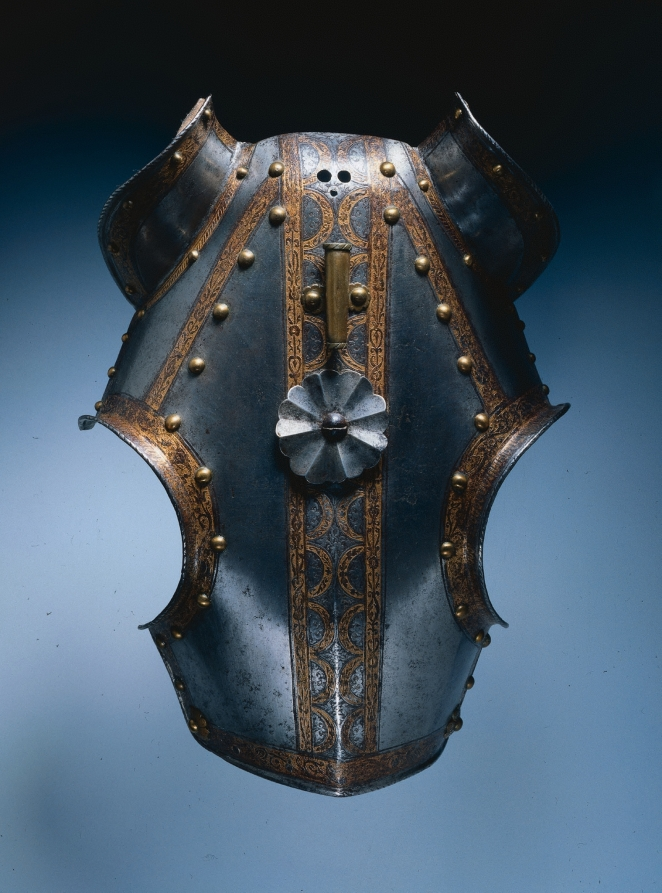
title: Demi-Chanfron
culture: Germany, Augsburg, 16th century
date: c. 1550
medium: steel, etched and gilded; leather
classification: Arms and Armor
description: The chanfron, head defense for a horse, was introduced in the 1300s. It included two side pieces to protect the cheeks. In the 16th and 17th centuries, when armor failed to protect against firearms, it assumed greater importance as ornament. For this reason the demi (or half) chanfron covered the forehead of the horse but extended, like this one, only halfway down the nose. The Habsburg Spanish Court was served by the armorers of Augsburg in the 16th century. This impressively decorated piece, by tradition, is said to have once belonged to Philip II of Spain (1527–1598).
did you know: A knight depended on his horse as both a weapon and a means of defense, and thus went to great lengths to care for and protect his charger.